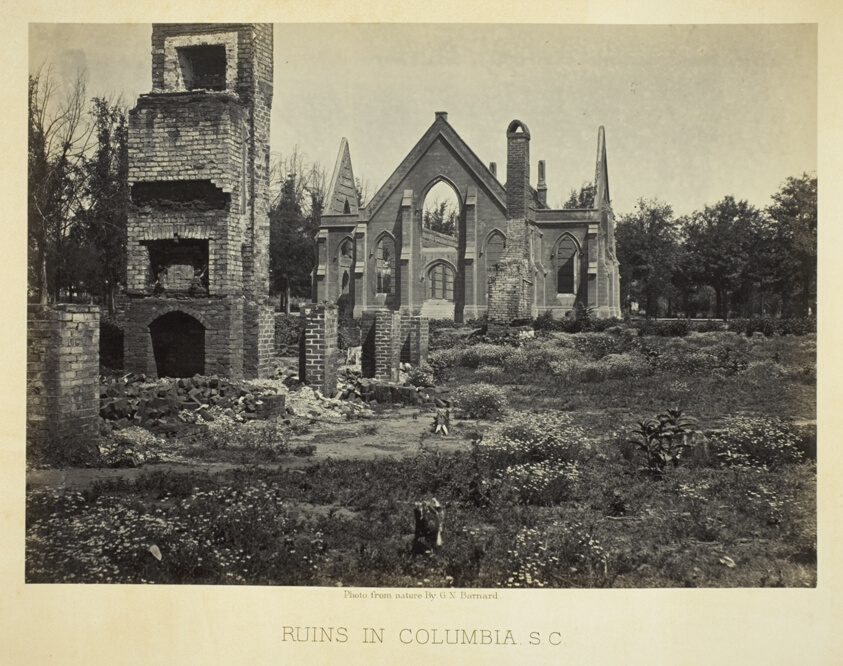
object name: Photograph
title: Ruins in Columbia, S.C.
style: 19th century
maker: George N. Barnard (American, 1819–1902)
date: 1865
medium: Albumen print, plate 54 from the album "Photographic Views of the Sherman Campaign" (1866)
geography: United States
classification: albumen silver print; photographic process; photography; photograph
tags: Collected by Hugh Edwards, Sherman's Campaign 1866